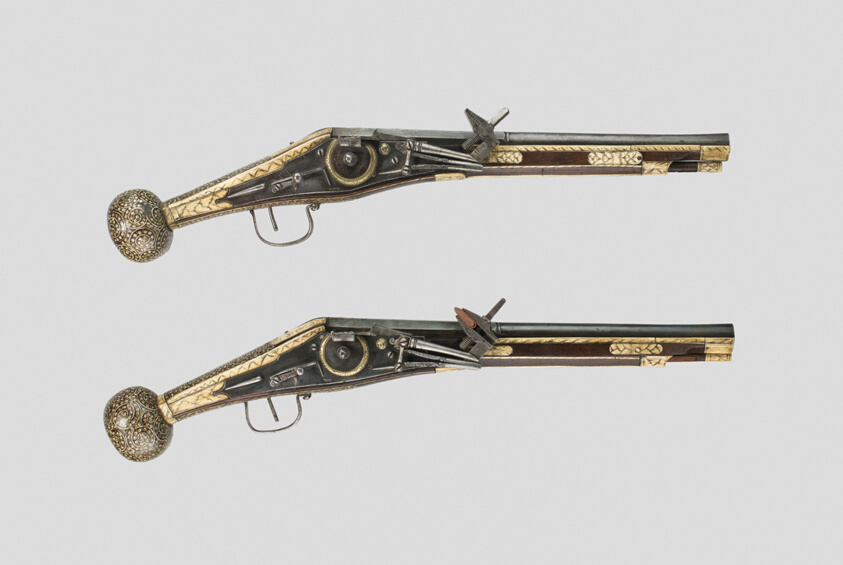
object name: Arms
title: Pair of Wheellock Pistols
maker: A. Drechsler; German, Dresden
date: 1577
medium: Steel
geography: Dresden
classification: firearm-handgun; arms; arms and armor